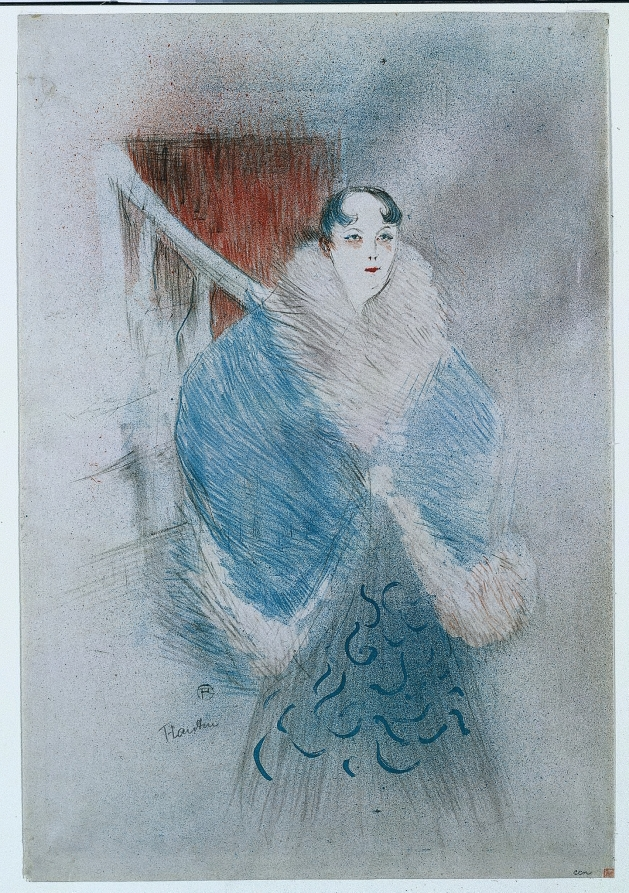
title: Elsa, Dite la Viennoise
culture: France, 19th century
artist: Henri de Toulouse-Lautrec (French, 1864–1901)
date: 1897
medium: color lithograph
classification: Print